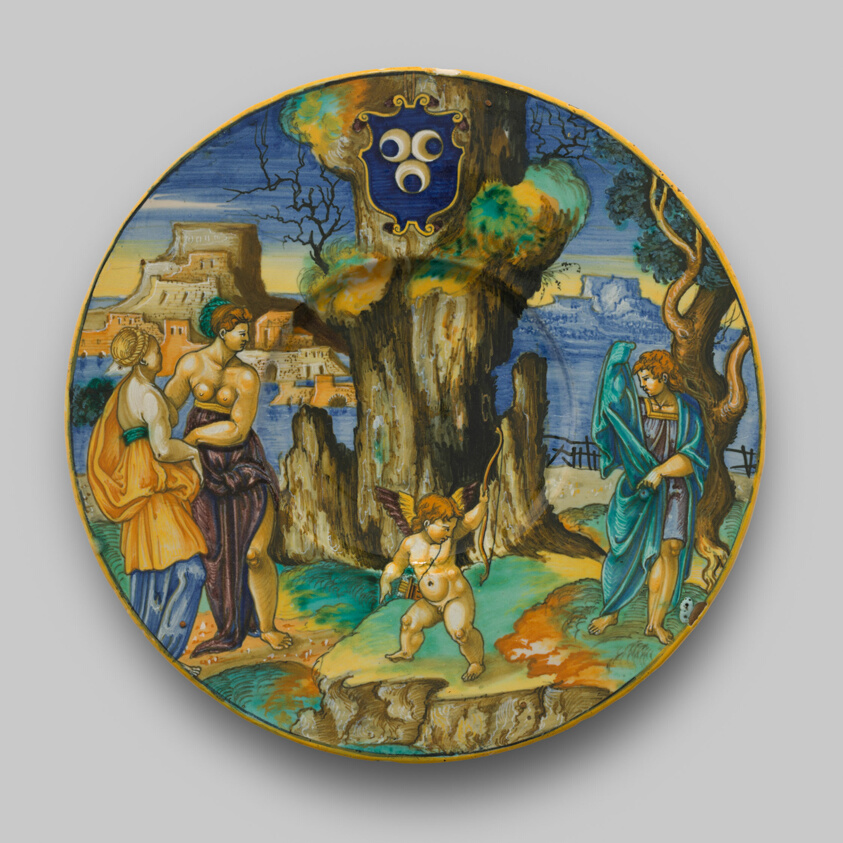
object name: Ceramics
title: Plate with Narcissus, Cupid, and Echo Transformed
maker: Francesco Xanto Avelli (Italian, active about 1525-1542)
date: c. 1530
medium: Tin-glazed earthenware (maiolica)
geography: Urbino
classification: ceramics; european decorative arts; decorative arts